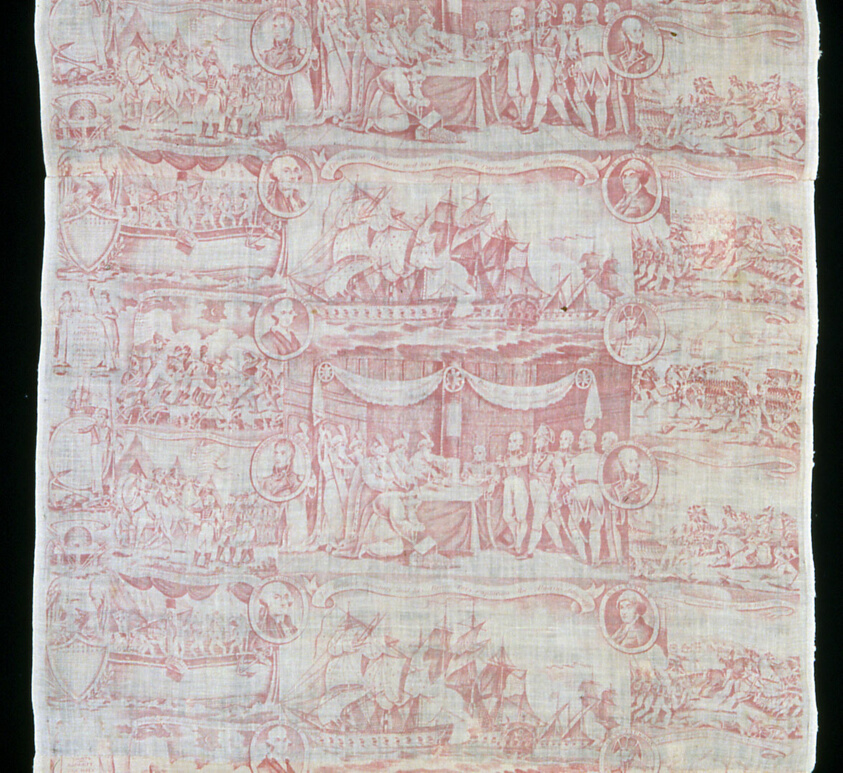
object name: Textile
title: The Gallant Decature and His Brave Tars Capturing the Algerine Admiral (Furnishing Fabric)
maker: England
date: c. 1820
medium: Cotton, plain weave; engraved roller printed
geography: England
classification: textile; weaving - printed; furnishing textile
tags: propaganda